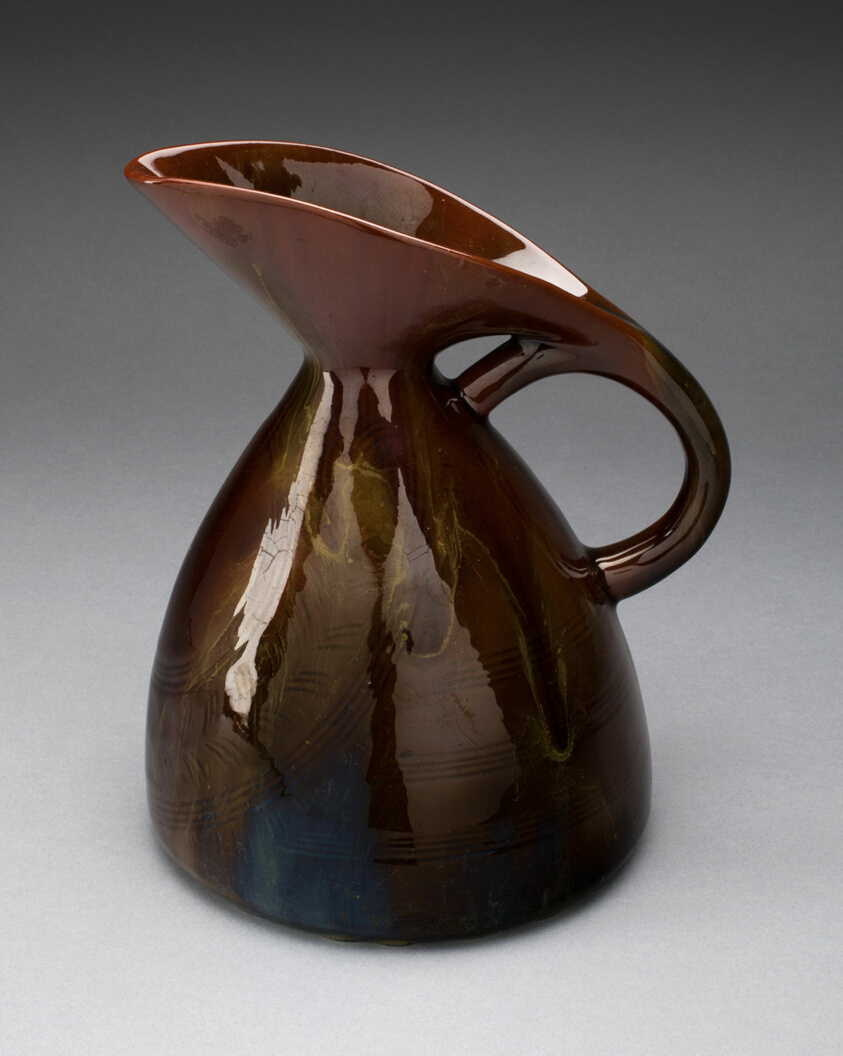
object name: Ceramics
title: Pitcher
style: Japanism, japonism, design reform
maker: Designed by Christopher Dresser (English, born Scotland, 1834-1904); Made by Linthorpe Art Pottery (Yorkshire, England, 1879-1889)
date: 1880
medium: Lead-glazed earthenware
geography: Yorkshire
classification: pitcher (vessel); vase; earthenware; vessel; european decorative arts; ceramics